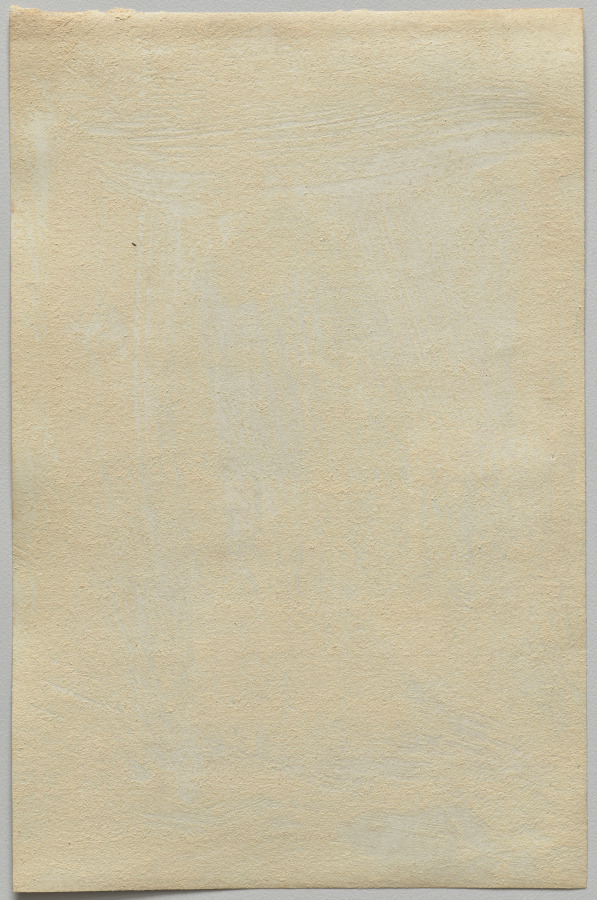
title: Interior of Church, Neemuch (recto, right)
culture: India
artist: Raja Deen Dayal (Indian, 1844–1905)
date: c. 1882–87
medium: albumen print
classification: Photograph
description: These photographs are part of an album, now disassembled, of around 105 photographs taken in India between 1885 and summer 1887 that provide glimpses into the lives of the British colonial elite and royal and upper-class Indians. The museum holds another group of 37 pictures from this album (2016.266), which was probably commissioned by a British civil servant visiting or working in India around 1888 as a personal souvenir of his experiences there.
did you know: Raja Deen Dayal is regarded now, and was considered during his lifetime, to be India’s most important 19th-century photographer.